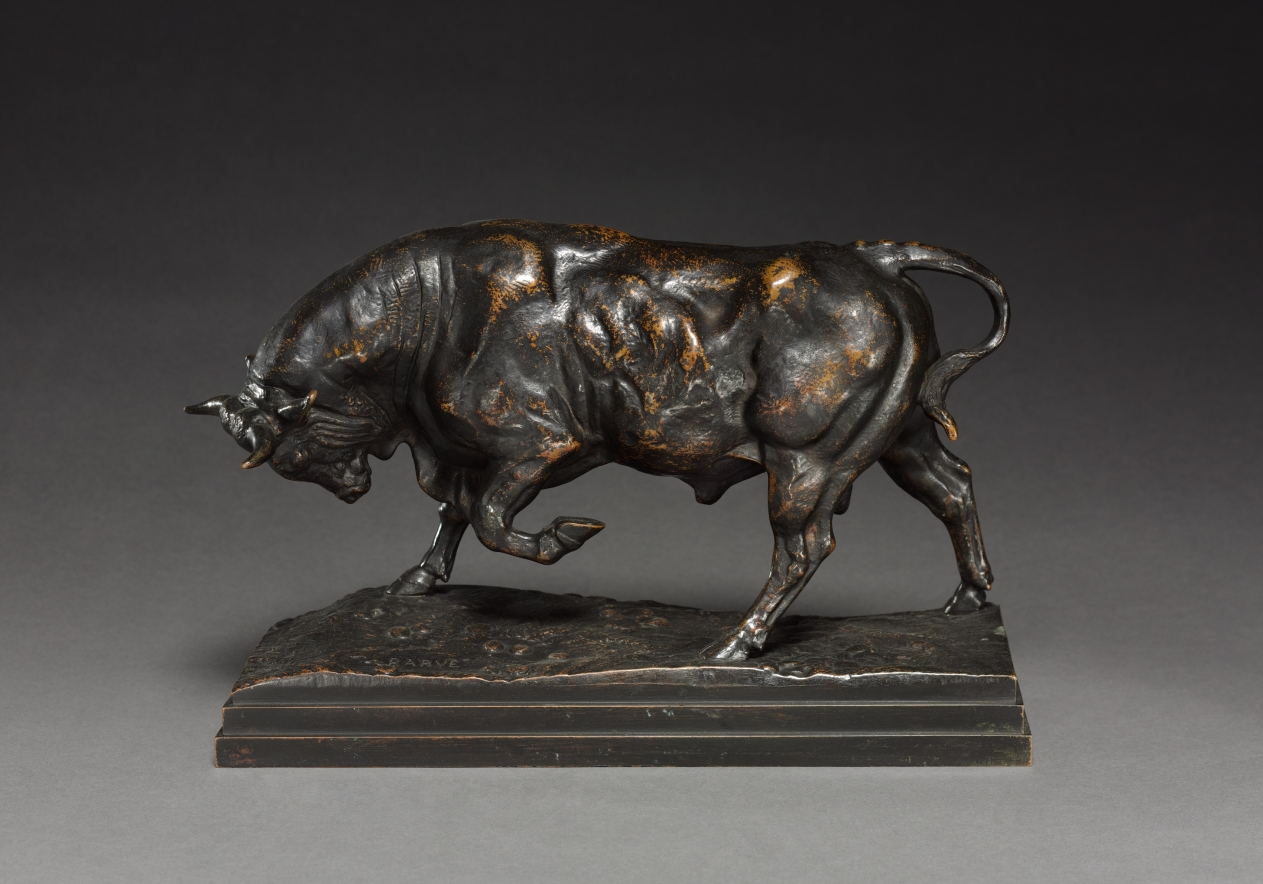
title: Bull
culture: France, 19th century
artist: Antoine-Louis Barye (French, 1796–1875)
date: c. 1841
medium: bronze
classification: Sculpture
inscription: Signed: "Barye"